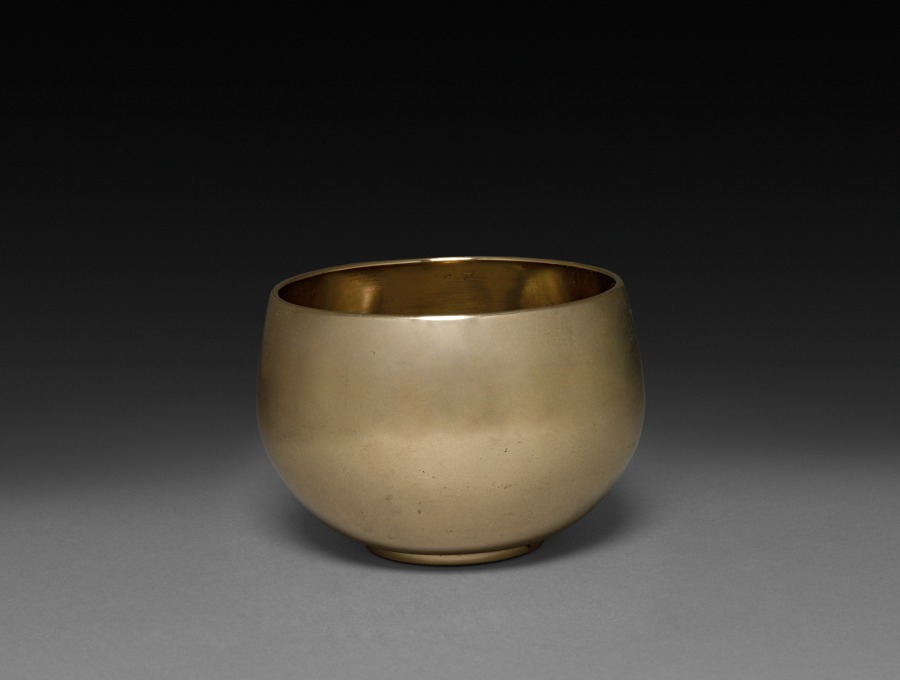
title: Container (base)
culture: Japan, Meiji period (1868–1912) to Taishō period (1912–26)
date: early 1900s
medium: brass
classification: Metalwork